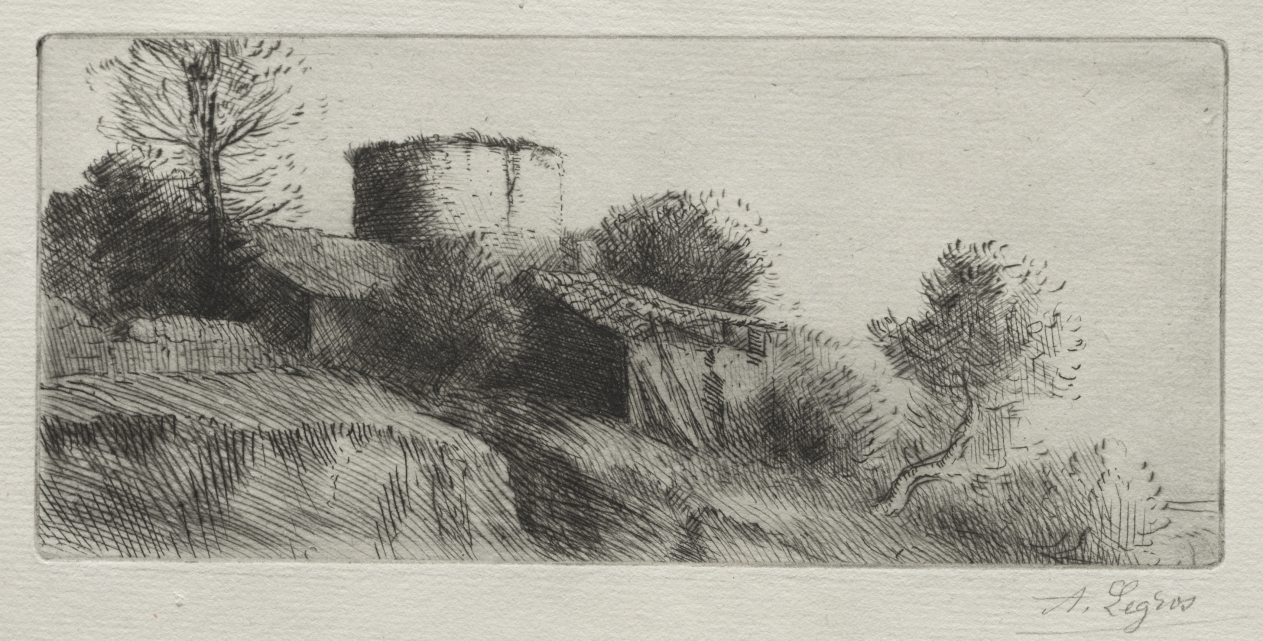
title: Pigeon Tower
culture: France, 19th-20th century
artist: Alphonse Legros (French, 1837–1911)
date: c. 1857–1911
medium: etching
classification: Print